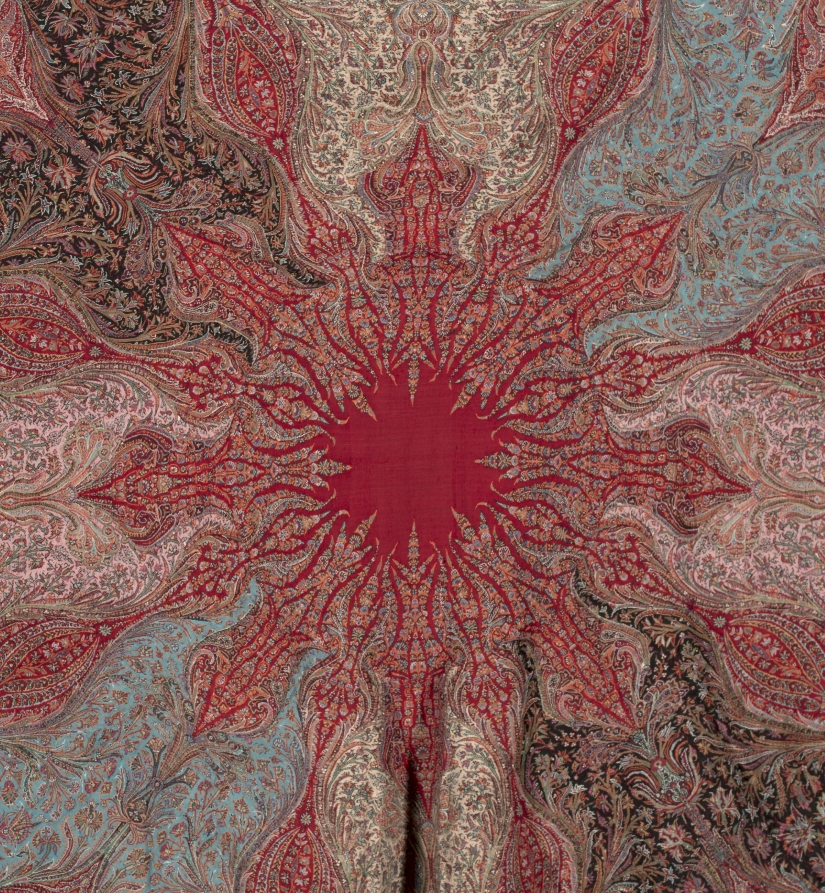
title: Square Multi-Season Pieced Shawl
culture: India, Kashmir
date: 1880s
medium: wool; 2/2 twill tapestry (S), double interlocked, pieced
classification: Textile